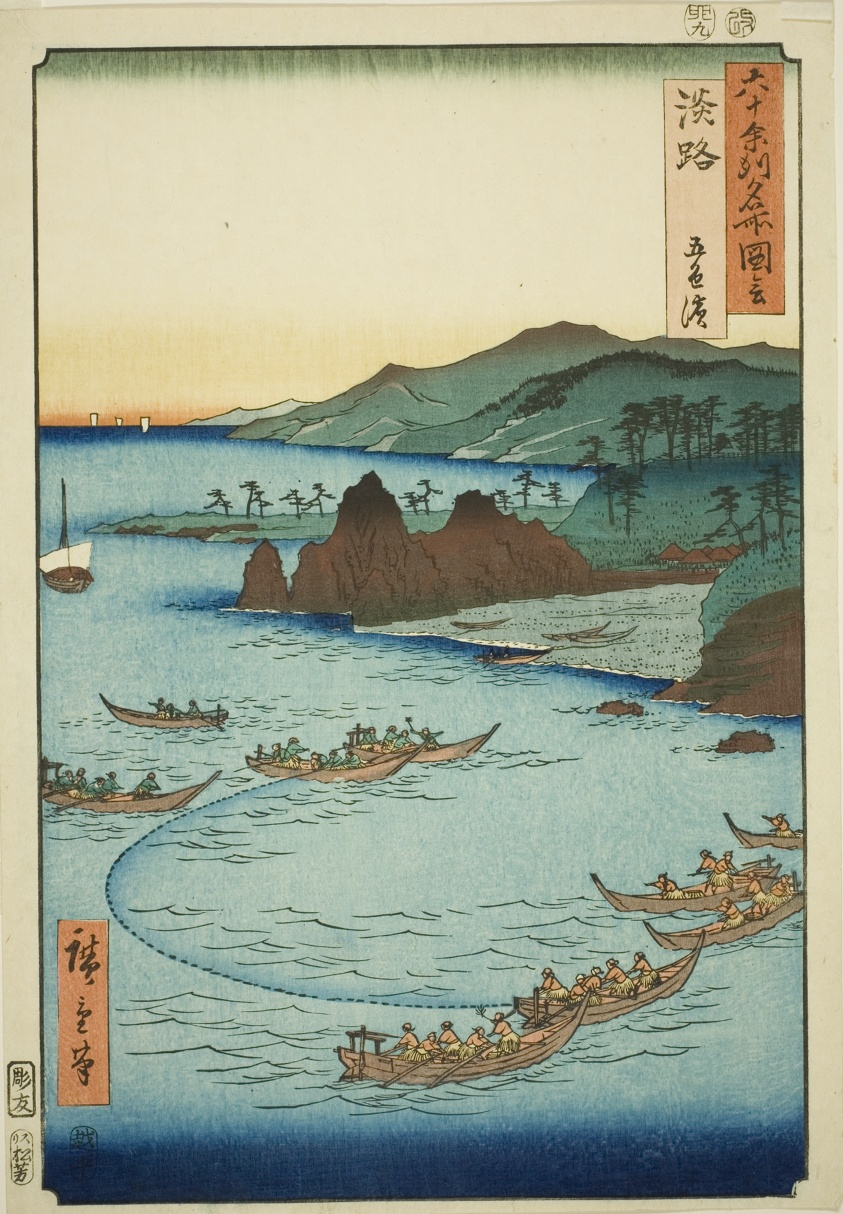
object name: Print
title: Awaji Province: Goshiki Beach (Awaji, Goshiki hama), from the series "Famous Places in the Sixty-odd Provinces (Rokujuyoshu meisho zue)"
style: Japanese (culture or style)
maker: Utagawa Hiroshige 歌川 広重; Japanese, 1797-1858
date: 1855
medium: Color woodblock print; oban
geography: Japan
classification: woodblock print; print; asian art